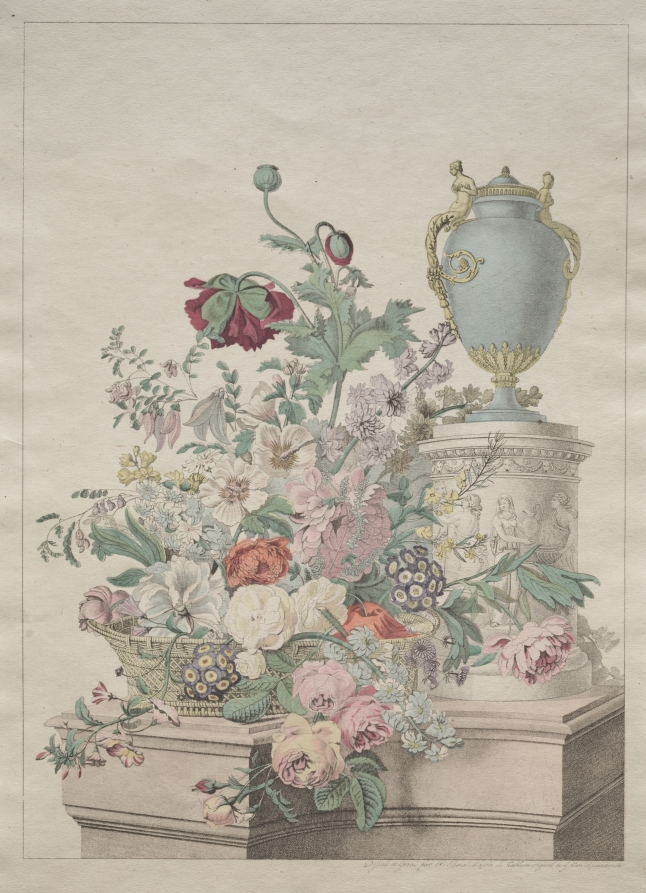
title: Flore Pittoresque ou Recueil de Fruits et de Fleurs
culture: France, 19th century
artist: Antoine Chazal (French, 1793–1854)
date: 1825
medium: stipple engraving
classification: Print